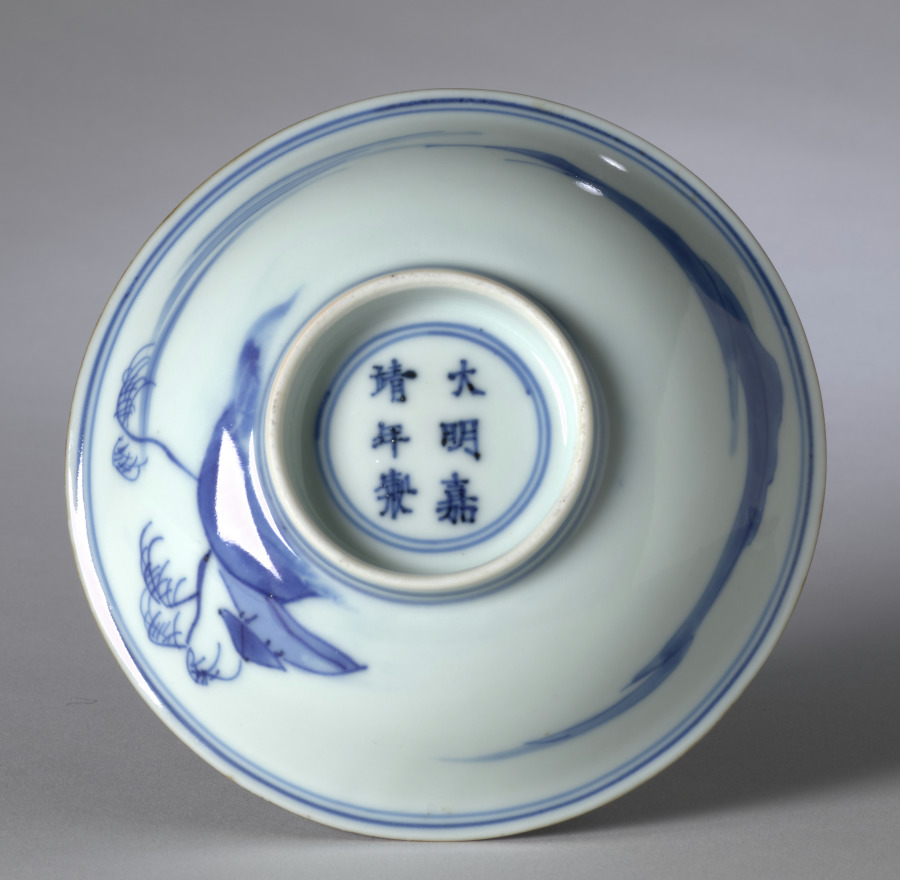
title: Dish with Landscape and Inscription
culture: China, Qing dynasty (1644-1911), Kangxi period (1662-1722)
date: 1662–1722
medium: porcelain, underglaze cobalt-blue decoration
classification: Ceramic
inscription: 何物為君贈，湘江之畫圖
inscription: 大明嘉靖年製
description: The river scene, composed of two shores divided by waterafter the Yuan dynasty master Ni Zan is inscribed: What shall I present the gentleman with? A picture of the Xiang River. A tributary of the Yangzi in Hunan province, the Xiang River is associated with Chinese literature and history, such as the Xiang goddesses, loyal consorts of emperor Shun. They are mentioned in the ancient Songs of the South (Chuci), known for staining the bamboo along the Xiang River with their tears when they thought him lost in the floods. The dish may have been a gift between two departing friends or for a couple.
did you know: There is an apocryphal inscription on the bottom of the dish.